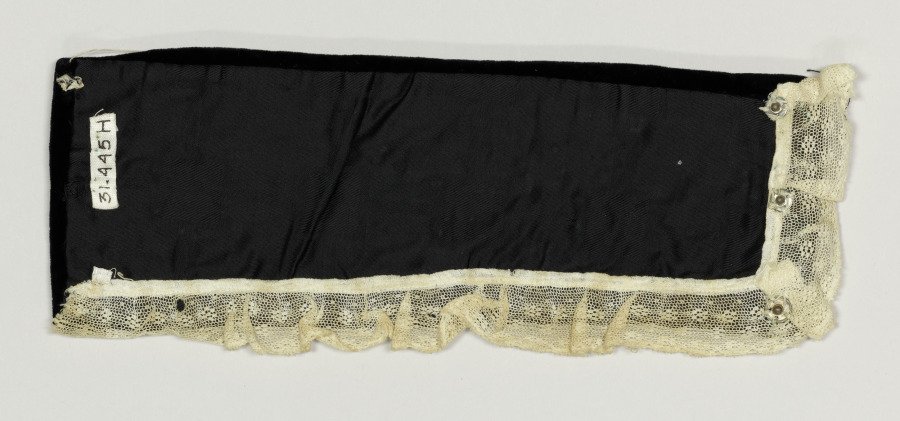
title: Woman's Costume (Cuff)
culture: Italy, Sicily, 19th century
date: 1800s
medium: velvet (black) with metal thread embroidery and lace edging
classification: Garment